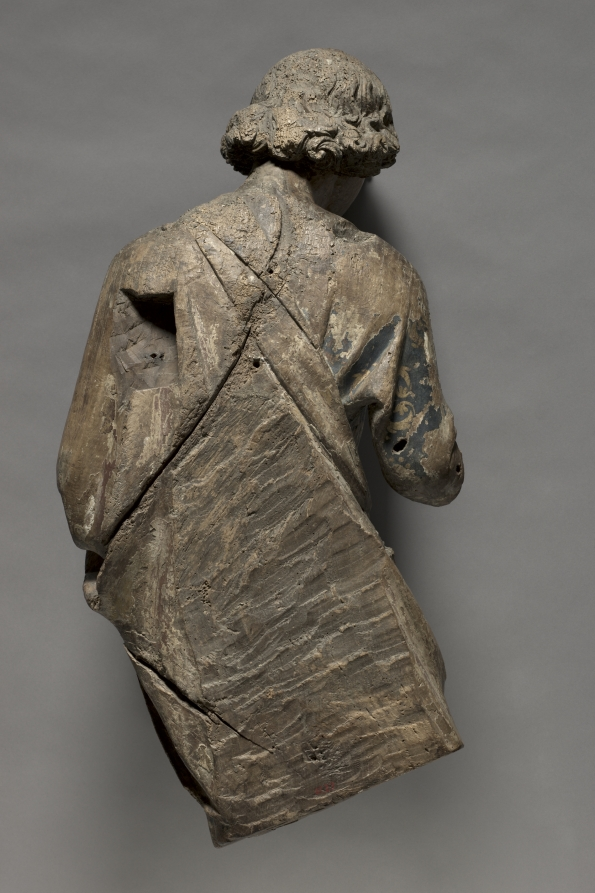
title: Angel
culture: France, vicinity of Reims, 13th century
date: c. 1250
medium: walnut with traces of gilding and polychromy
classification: Sculpture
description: Surviving in fragmentary condition, this pair of angels lacks lower arms, hands, wings, and attributes. Their original paint and gilding, now almost entirely lost, once rendered their garments a rich brocade and their hair a luxuriant gold. Nonetheless, in their graceful poses and sublime faces—which may portray tragic interest, anguish, or deep concern—their original delicacy and power are still evident. They embody the monumental style of 13th-century High Gothic cathedral sculpture in France. Their style specifically suggests they were carved in or around Reims, possibly by sculptors associated with the cathedral there. Their original placement is unknown, but they may have flanked an altar on columns.